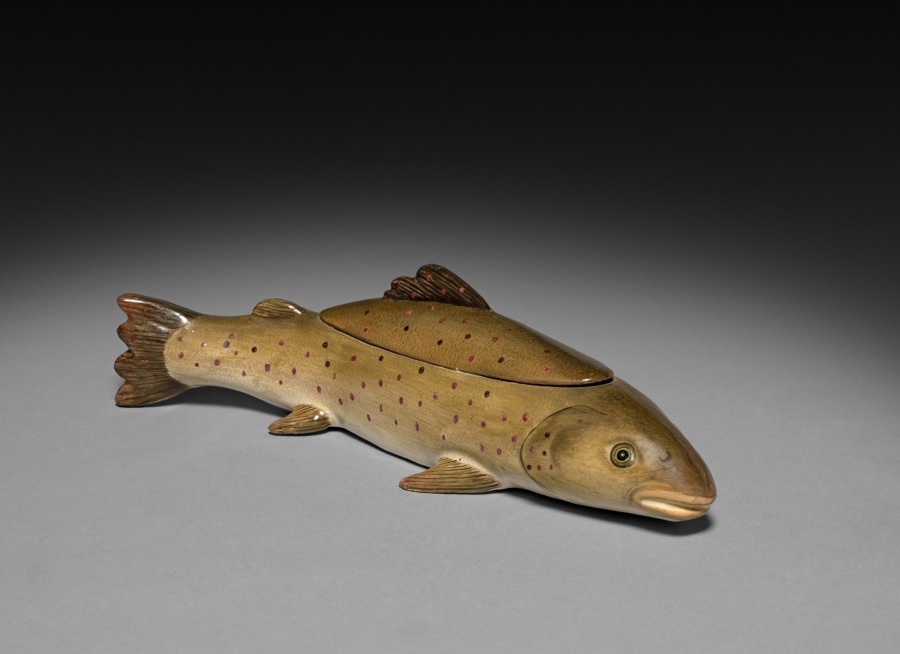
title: Box in the Form of a Fish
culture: France, Niderviller, 18th century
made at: Niderviller Factory (French)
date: 1767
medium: ceramic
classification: Ceramic